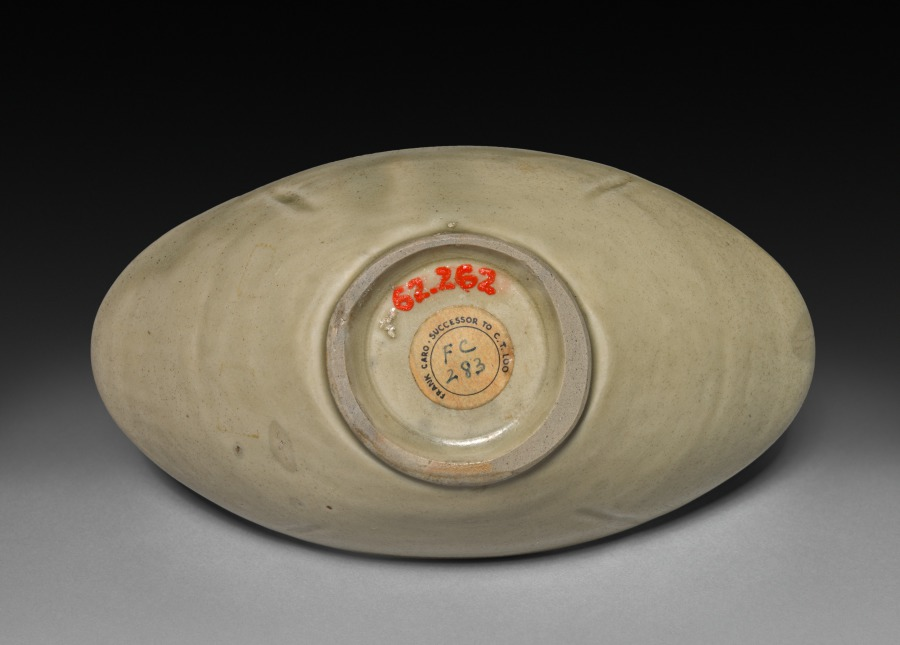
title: Chan: Oval Shaped Shallow Cup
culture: China, Tang dynasty (618-907) - Five dynasties (907-960)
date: 900s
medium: Glazed gray stoneware, Yue ware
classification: Ceramic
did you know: Four incised lines on the outside with indentations in the rim above suggest a petal form.